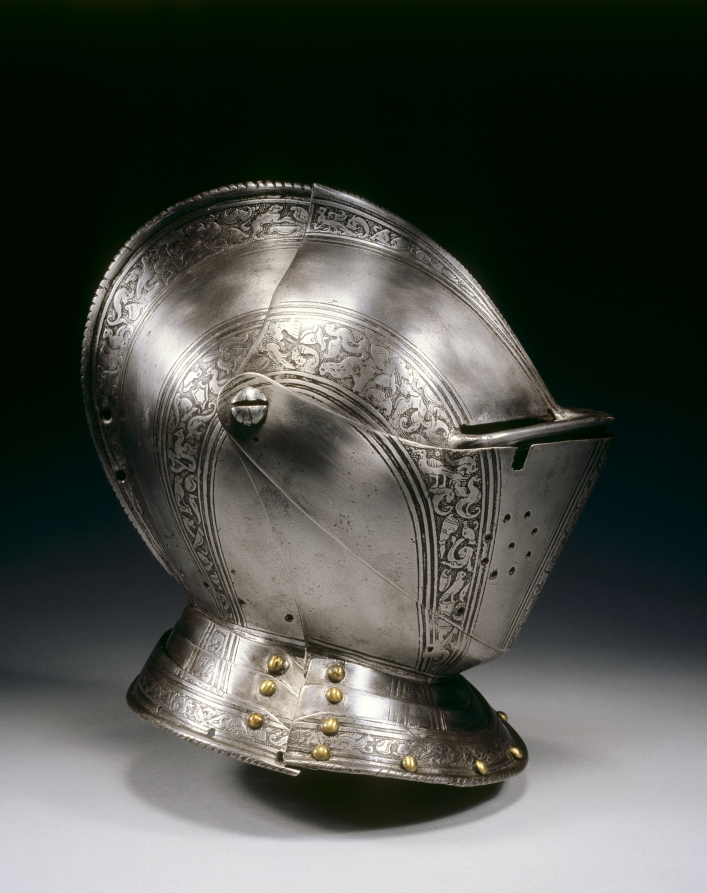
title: Close Helmet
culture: North Italy, Brescia (?), 16th century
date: c. 1575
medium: steel with etched decorative bands and roundels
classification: Arms and Armor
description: Decoration was critical to fine armor, and etching was the most commonly used technique. Here, the bands along the borders are etched. On the breastplate, pauldrons (shoulder guards), and tassets (hip and upper leg guards), etched medallions enclose profile busts reminiscent of ancient Roman portraits. The lance rest on the breastplate indicates that this half-suit was once part of a complete field armor for man and horse. The etching technique used for armor was developed in the late 1400s. The metal surface was first coated with an acid-resistant substance, such as wax or varnish. An etching needle was then used to scratch a design into the surface. The exposed areas were then treated with an acid that would "bite" or etch the lines into the metal. When the coating was removed, the etched design was blackened for contrast.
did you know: Etching, by far the most common technique for armor decoration, involved the use of a graving tool assisted by acid to create a design. The etched design could then be blackened to create contrast as shown here.